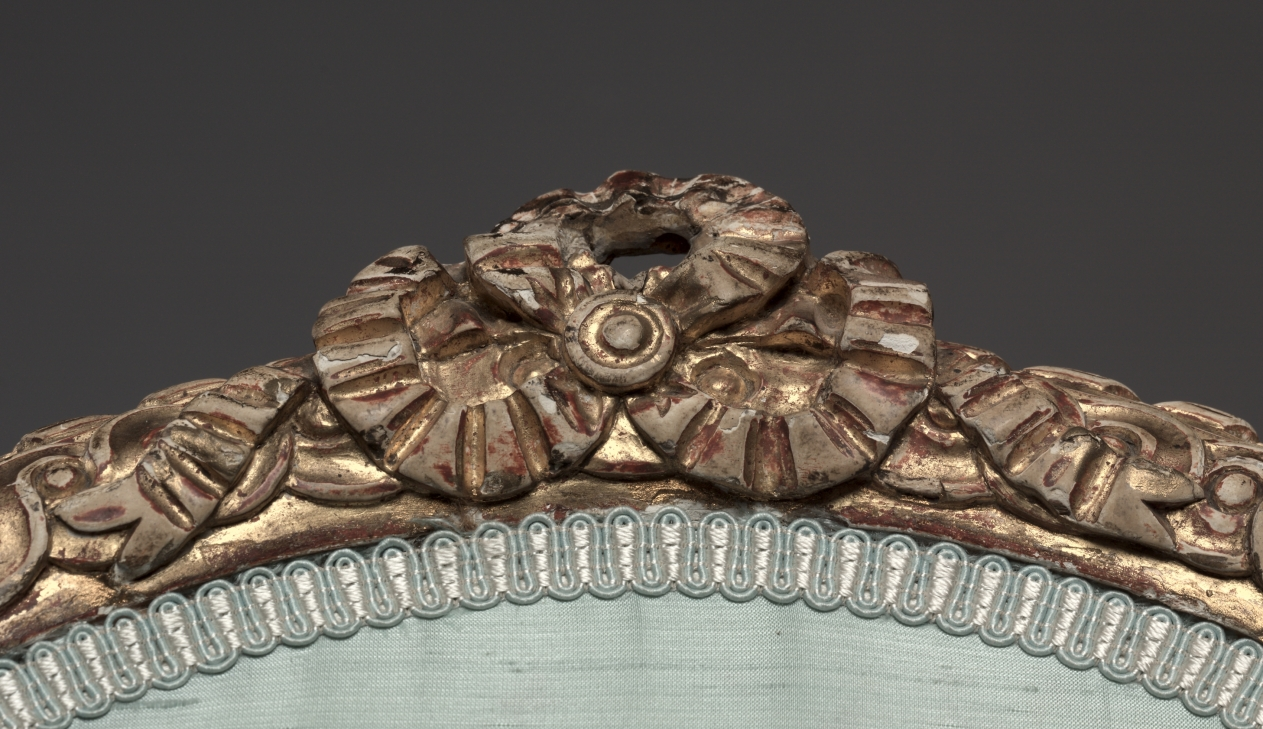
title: Side Chair (2 of 2)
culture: France, style of Louis XVI, 18th century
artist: Jean Baptiste fils Lelarge (French, 1743–1802)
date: 1700s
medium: gilded wood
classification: Furniture and woodwork